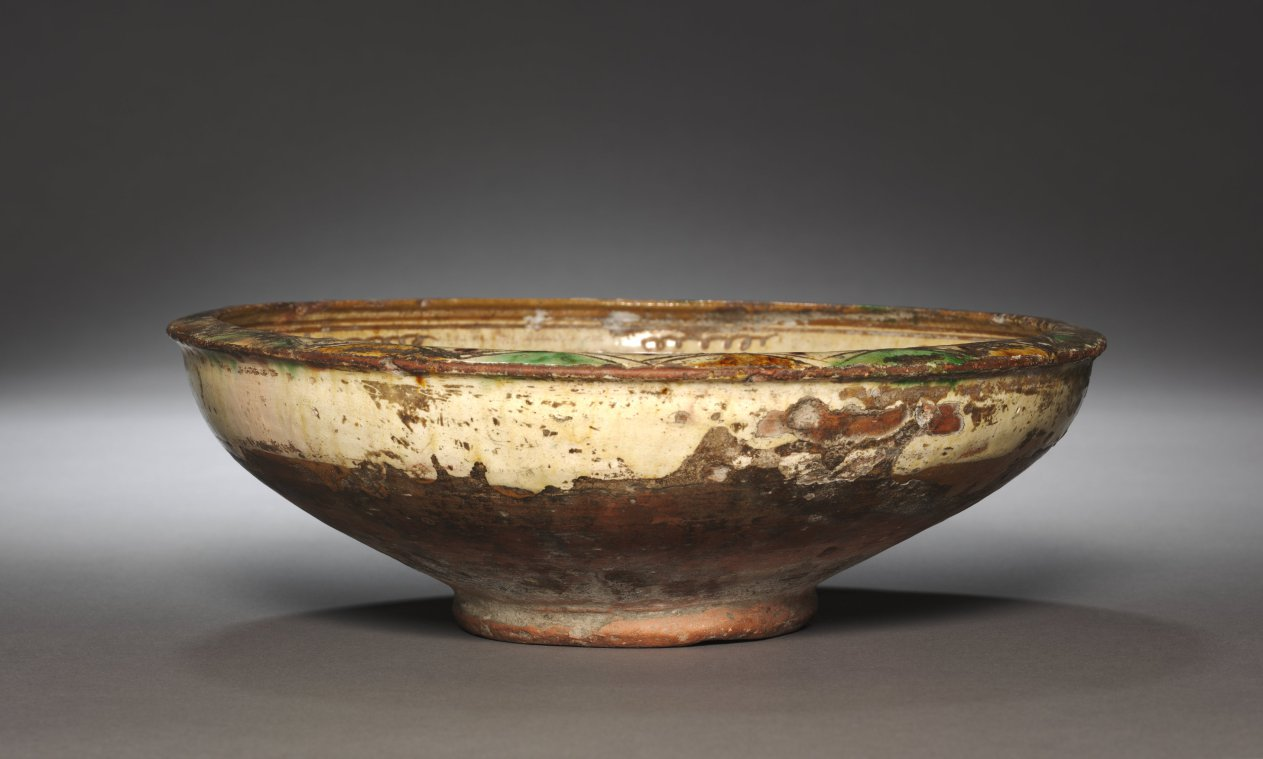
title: Bowl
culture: Northwest Iran, Aghkand (Azerbaijan area), 12th–13th century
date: 1100s–1200s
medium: earthenware with underglaze slip-painted decoration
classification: Ceramic